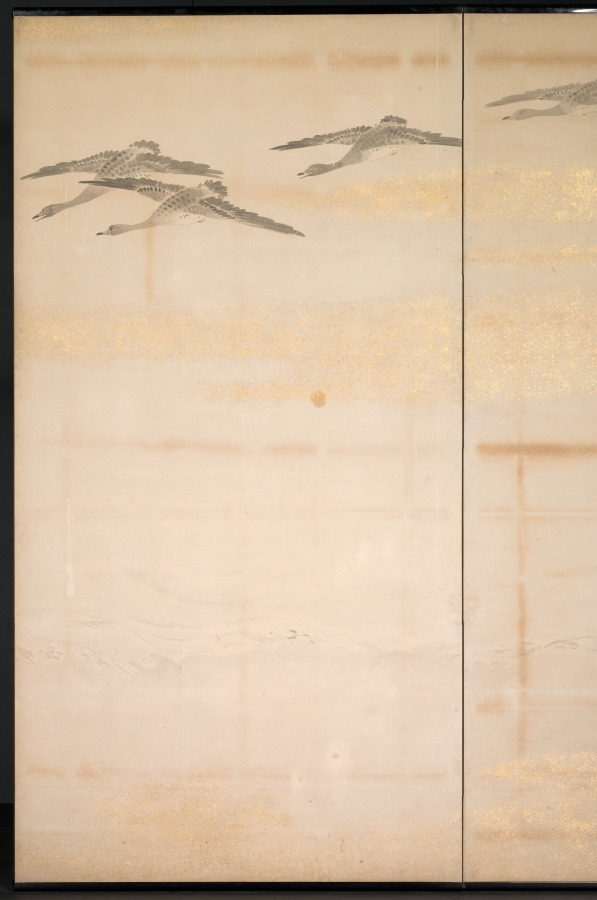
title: Geese, Reeds and Water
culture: Japan, Edo period (1615–1868)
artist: Yamamoto Baiitsu (Japanese, 1783–1856)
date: 1800s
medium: One of a pair of four-panel folding screens; ink, color, and cut gold foil on paper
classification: Painting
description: This byōbu composition differs from most in that it comprises two four-panel screens, rather than two six-panel units. Since the current mounting is modern, it is impossible to determine whether its present configuration represents its original design. Some panels may have been removed to help the screens better fit into a modern interior space. Baiitsu worked almost exclusively in monochromatic ink tones and favored classical Chinese painting themes.